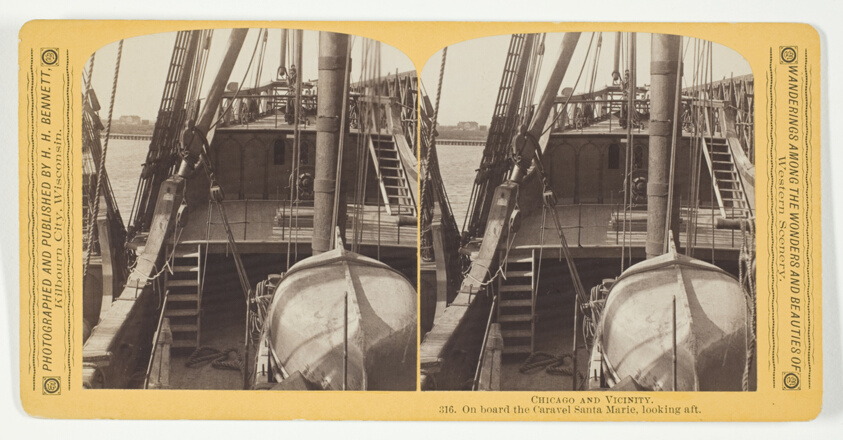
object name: Photograph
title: On board the Caravel Santa Marie, looking aft, from the series "Chicago and Vicinity"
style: 19th century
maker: Henry Hamilton Bennett (American, born Canada, 1843-1908)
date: 1887/93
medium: Albumen print, stereo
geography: Chicago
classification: photography; photograph; albumen silver print; stereograph (albumen)